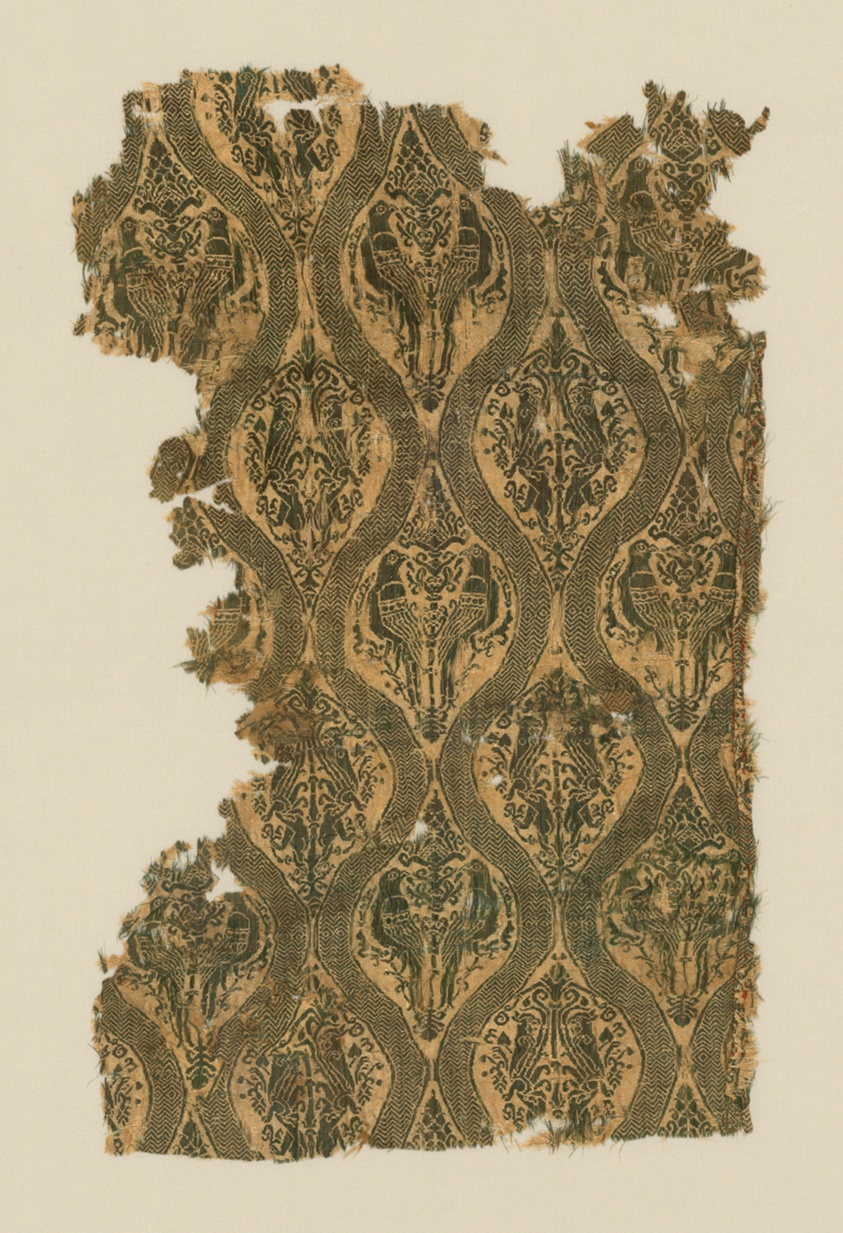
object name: Textile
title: Fragment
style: ayyubid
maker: Egypt or Syria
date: Ayyubid Dynasty (1171–1250), 1200/50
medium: Silk; lampas technique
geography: Egypt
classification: textile; weaving